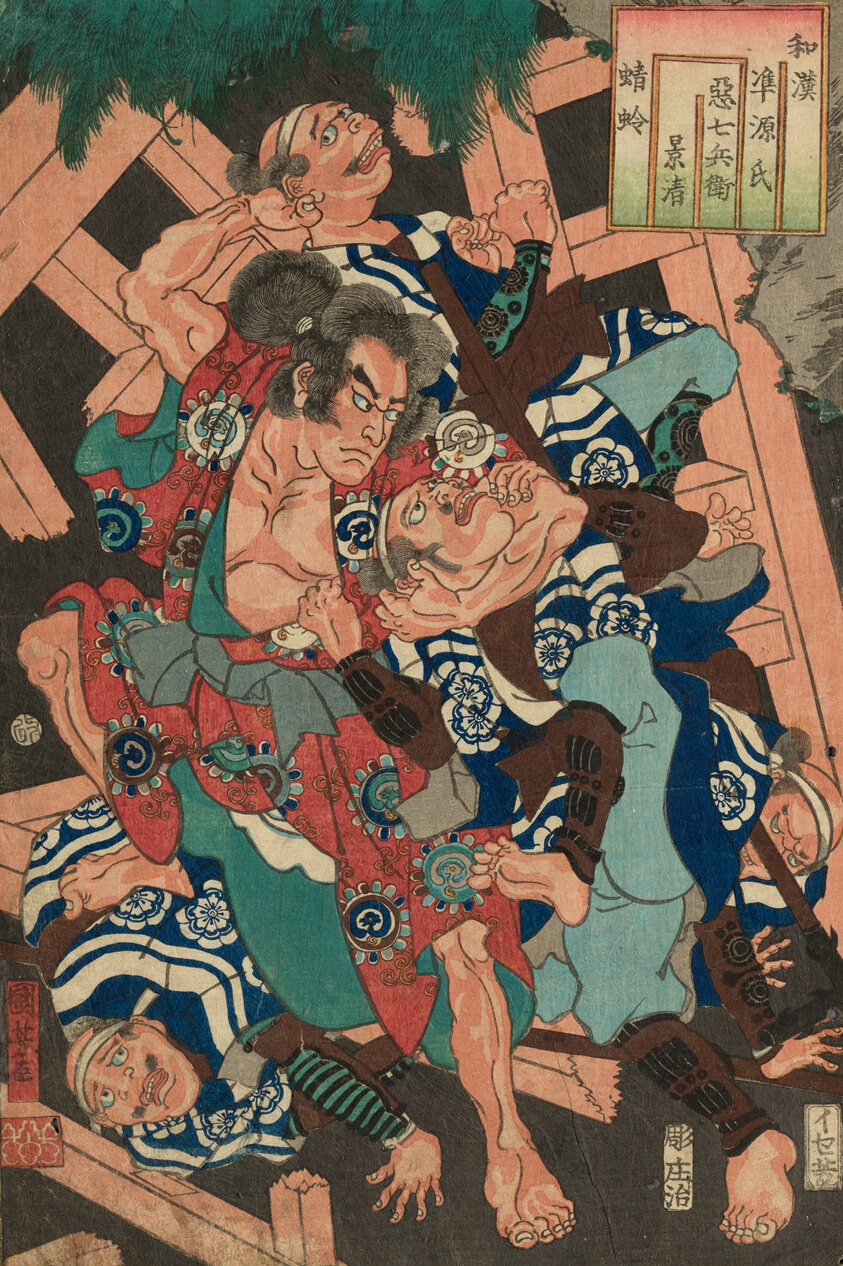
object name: Print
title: Kagero: Akushichibei Kagekiyo, from the series "Japanese and Chinese Comparisons for the Chapters of Genji (Wakan nazorae Genji)"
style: Japanese (culture or style)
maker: Utagawa Kuniyoshi (Japanese, 1797–1861)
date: 1855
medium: Color woodblock print; oban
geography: Japan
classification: woodblock print; print